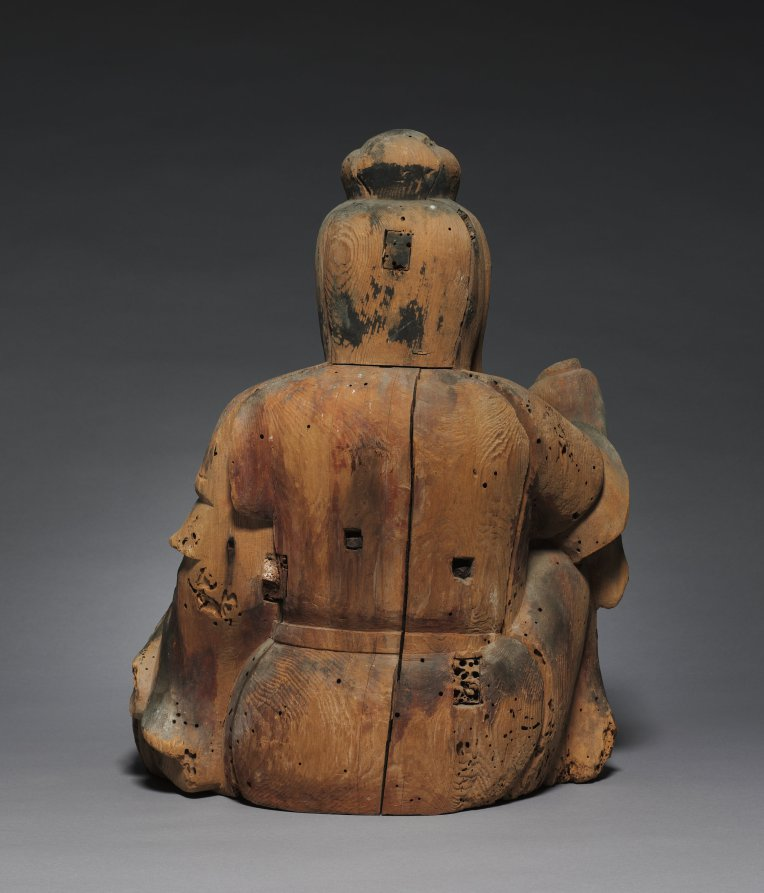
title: Shinto Deity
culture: Japan, Heian period (794–1185)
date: 900s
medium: wood, with traces of polychromy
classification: Sculpture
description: This sculpture represents a kami, the name for deities associated with the Japanese religious tradition called Shinto. It is said to have originally been created for the Usa Hachiman Shrine in Oita on the island of Kyushu. The shrine houses four main kami: Hime Okami, who assists those engaged in agriculture andsea travel; the legendary 5th-century emperor Ojin deified as the kami Hachiman; Empress Jingu; and the kami of Mount Kawara, who aids copper miners. The pose of this figure, dressed in robes reminiscent of a Tang dynasty court lady, suggests that she may have been an attending deity.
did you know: Traces of pigment on the surface of this sculpture indicate it was once painted.